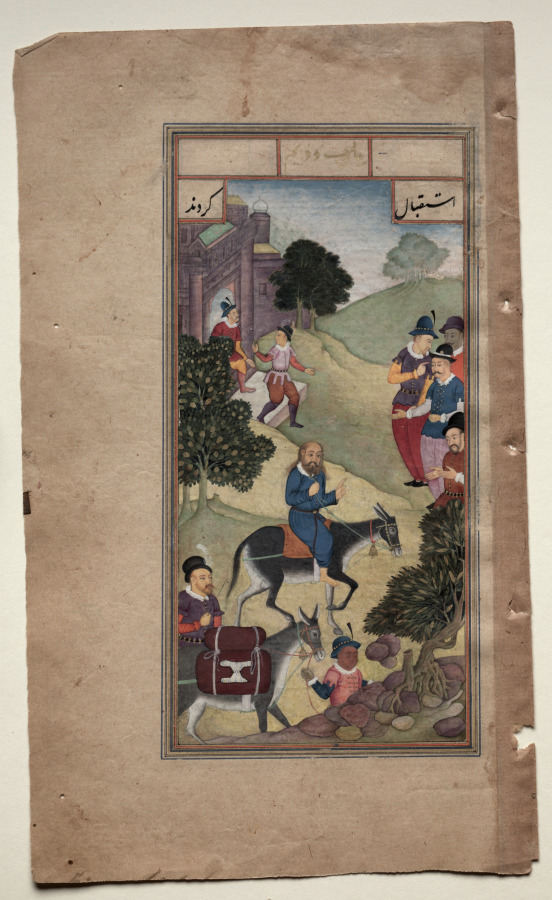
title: The Entry into Jerusalem (folio 156 recto), from a Mirror of Holiness (Mir’at al-quds) of Father Jerome Xavier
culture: Mughal India, Allahabad, made for Prince Salim (1569–1627)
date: 1602–4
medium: Gum tempera, ink, color, and gold on paper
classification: Manuscript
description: Jesus rides astride a female donkey, as specified in the text, and he greets a group of four men, two of whom seem to welcome him with hands extended. He follows the road to the gates of Jerusalem, which appear in the upper left corner. Father Jerome devoted only three short lines to this episode, so perhaps its selection for illustration is connected to an old and popular Islamic saying: “If Jesus’s donkey is taken to Mecca, when it comes back it will still be a donkey.”